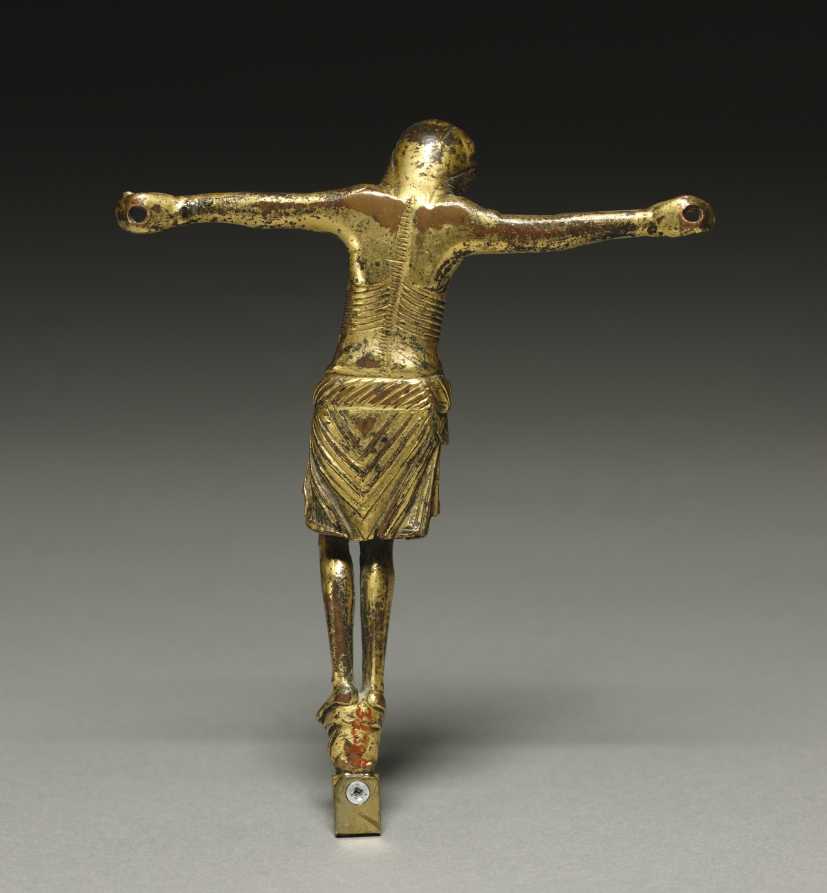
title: Crucified Christ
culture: Germany, Rhine Valley, Romanesque period, early 13th century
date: c. 1200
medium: gilt bronze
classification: Sculpture